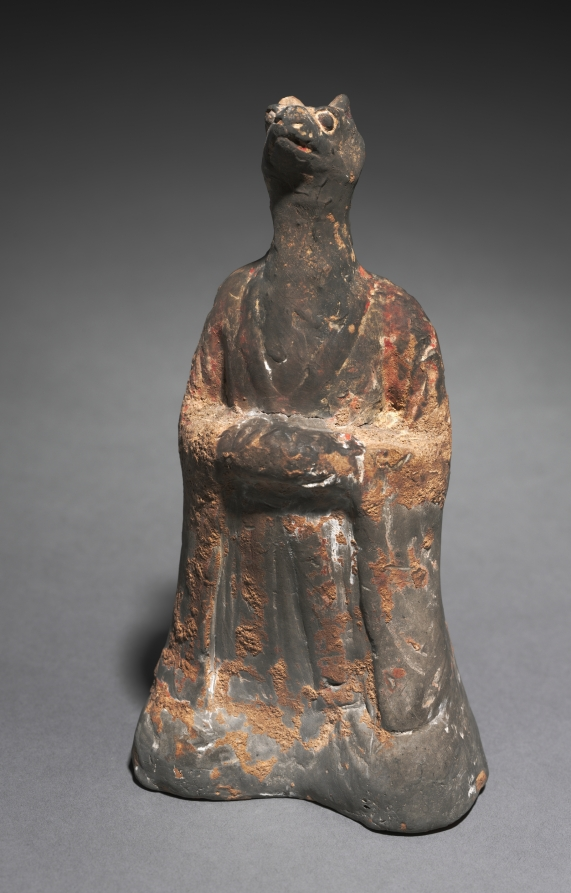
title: Mortuary Figure of the Zodiac Sign: Rat (Aries)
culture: China, Northern Wei dynasty (386-534)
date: 500s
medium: gray earthenware with traces of slip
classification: Sculpture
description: The twelve-animal zodiac series—rat, ox, tiger, rabbit, dragon, snake, horse, goat, monkey, rooster, dog, and boar—signifies a traditional Chinese concept of time structured in a cyclical order. The twelve animals are also linked to the art of fortune-telling that underlies human existence in connection with the changes of the universe. The use of the twelve zodiac animals as tomb furniture suggests they provided a cosmological structure for the afterlife.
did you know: This standing, robed, human figure has its arms crossed and the head of a rat.